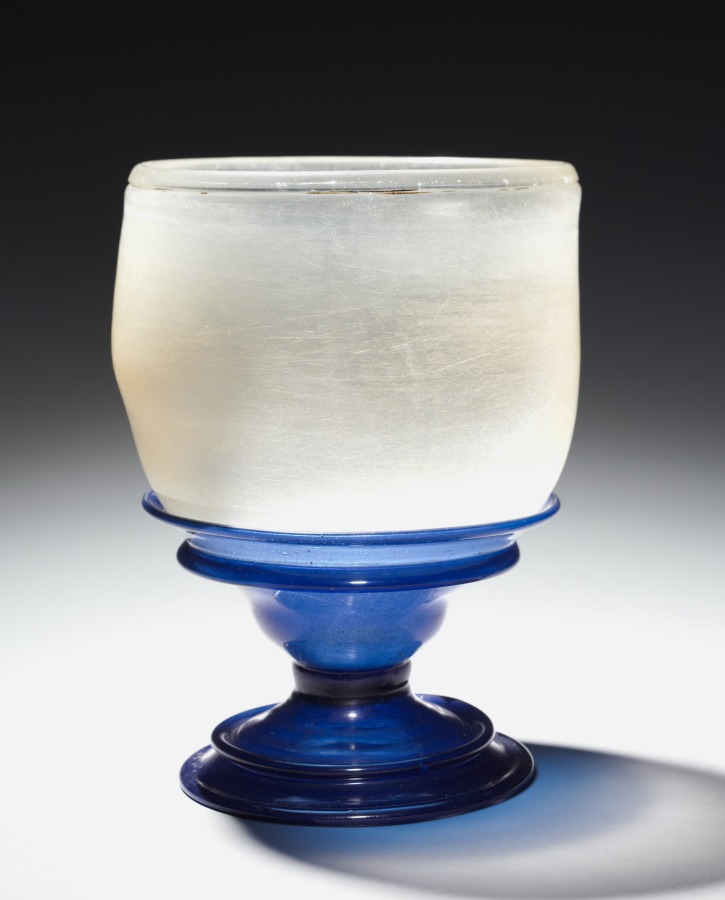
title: Bowl with Stand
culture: Syria, Roman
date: 100–400 CE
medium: glass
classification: Glass